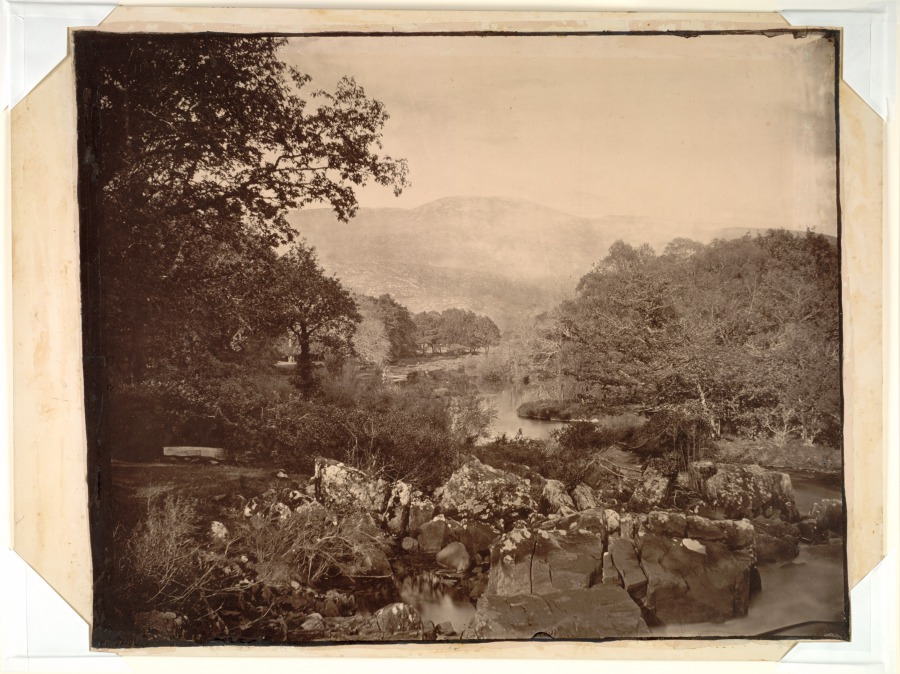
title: View from the Lawn, Dennicanniby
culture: England, 19th century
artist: Vernon Heath (British, 1819–1895)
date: 1870s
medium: carbon print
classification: Photograph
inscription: written in pencil on verso: "EC No7"; "Wilson"; in ink on verso: "View from Lawn. Dennicanniby. Killarney-S-"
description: A distinguished photographer who received royal patronage, Vernon Heath traveled extensively throughout the British Isles documenting estates and landscapes on commission. This carefully composed scenic view, taken just above the Upper Lake of Three Lakes of Killarney in southwest Ireland, exemplifies the pioneering technique he developed in the early 1860s for enlarging 12x10-inch glass negatives. Made when contact printing was the norm, Heath’s carbon-printed enlargements showed no distortion and preserved the general artistic effect, which brought praise from the photographic press. Through his outstanding ability to manipulate wet collodion plates in the field, he excelled at controlling light and rendering aerial perspective. Indeed, Heath was highly acclaimed for the pictorial detail and faithful description of the picturesque scenes his Victorian audience so admired. By 1871 the carbon pigment process was his preferred method for printing. It produced a softening effect and greater gradation of tone in his photographs while rendering them impervious to fading caused by natural light.